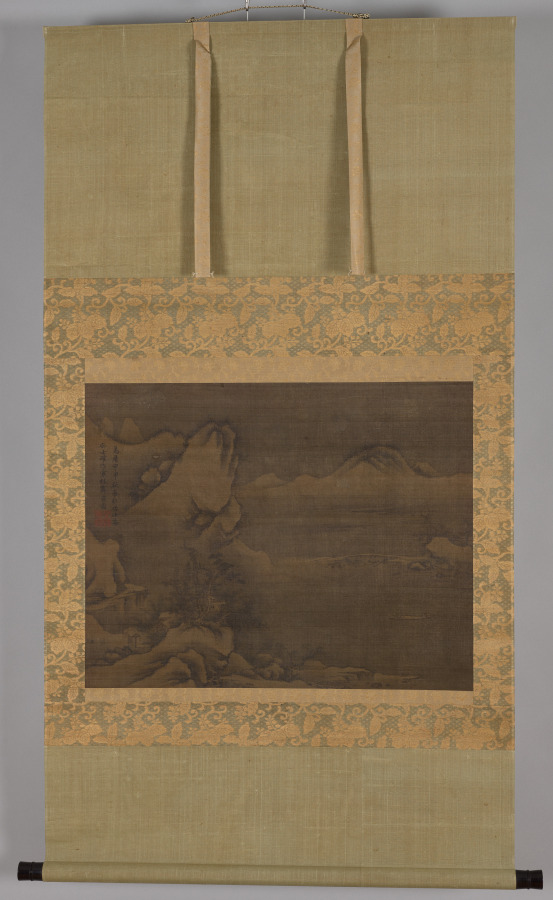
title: Snowscape with Figures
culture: Korea, Joseon dynasty (1392–1910)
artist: Kim Si (Korean, 1524–1593)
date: 1584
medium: hanging scroll; ink on silk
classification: Painting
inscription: The inscription (款識) on the upper left corner reads as following: 萬曆甲申秋養松居士爲安士確作寒林霽雪圖. The painter's seal (朱文方印) printed reads as following: 金禔季綏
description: This hanging scroll is a rare surviving example of early Joseon period painting. The painter Kim Si (1481–1537) was a member of the aristocracy, or high-ranking men. However, after his father, Kim Anro (1481–1537) fell out of power, Kim Si retreated himself and spent his life as a reclusive artist. In such a context, this image of a solitary scholar in his studio surrounded by trees and snow-covered mountains does not simply render an idealized life of a recluse focusing on scholarly pursuits; rather, it is the painter’s mindscape, indicating that the glory of his family has become a forgotten part of his past.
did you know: Having retreated to the snow-covered mountains, a scholar sits in his studio surrounded by trees. An empty wooden bridge in the distance appears to be longing for friends from afar. Such iconography often evokes the idea of an idealized recluse focusing on scholarly pursuits.